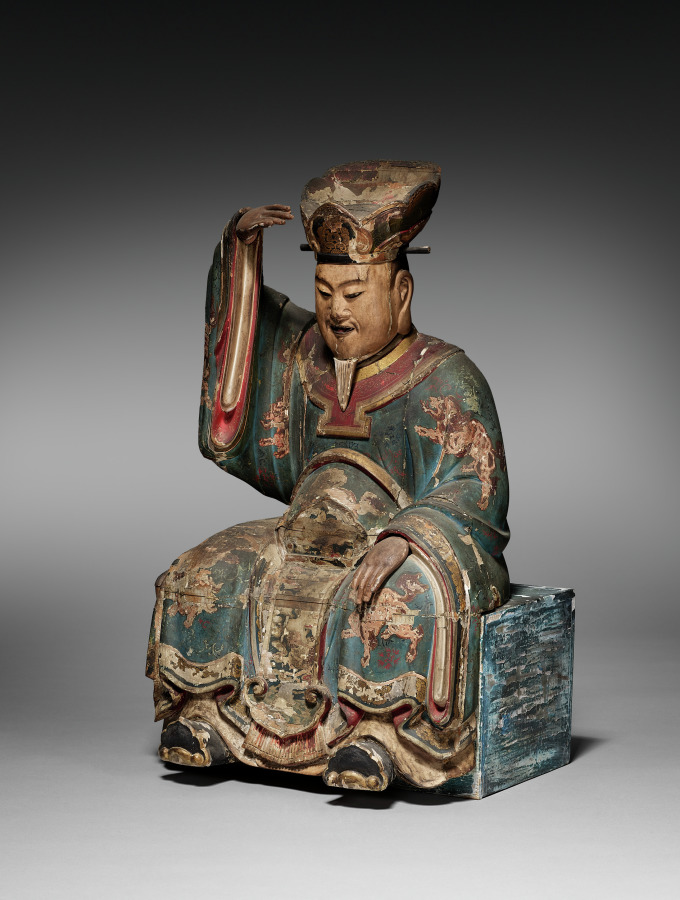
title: A King of Hell?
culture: Japan, Edo period (1615–1868)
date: c. 1800s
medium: wood, gesso, pigment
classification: Wood